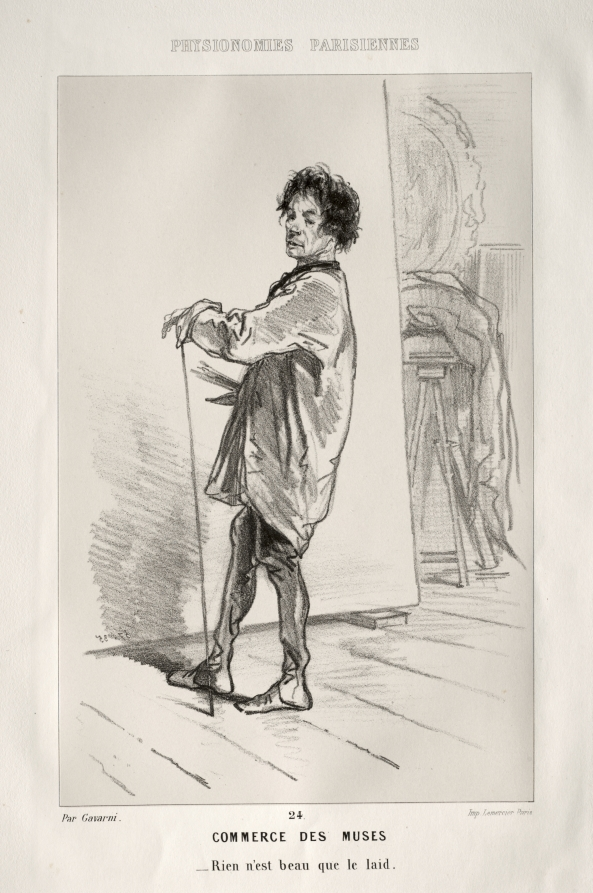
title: Commerce des Muses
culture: France, 19th century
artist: Paul Gavarni (French, 1804–1866)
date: c. 1857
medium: lithograph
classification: Print